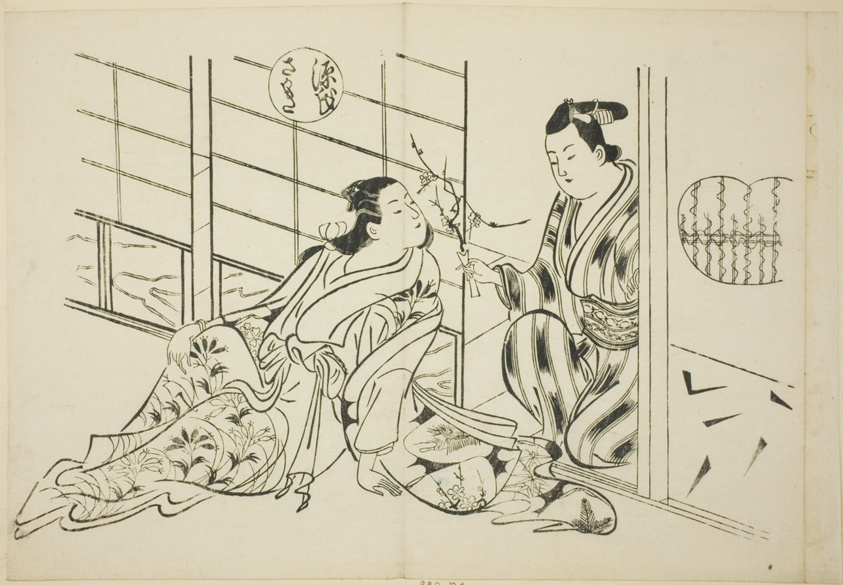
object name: Print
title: The Sakaki Chapter from "The Tale of Genji" (Genji Sakaki), from a series of Genji parodies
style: Japanese (culture or style)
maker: Okumura Masanobu (Japanese, 1686-1764)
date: c. 1710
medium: Woodblock print; oban, sumizuri-e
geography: Japan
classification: woodblock print; print; asian art; woodblock